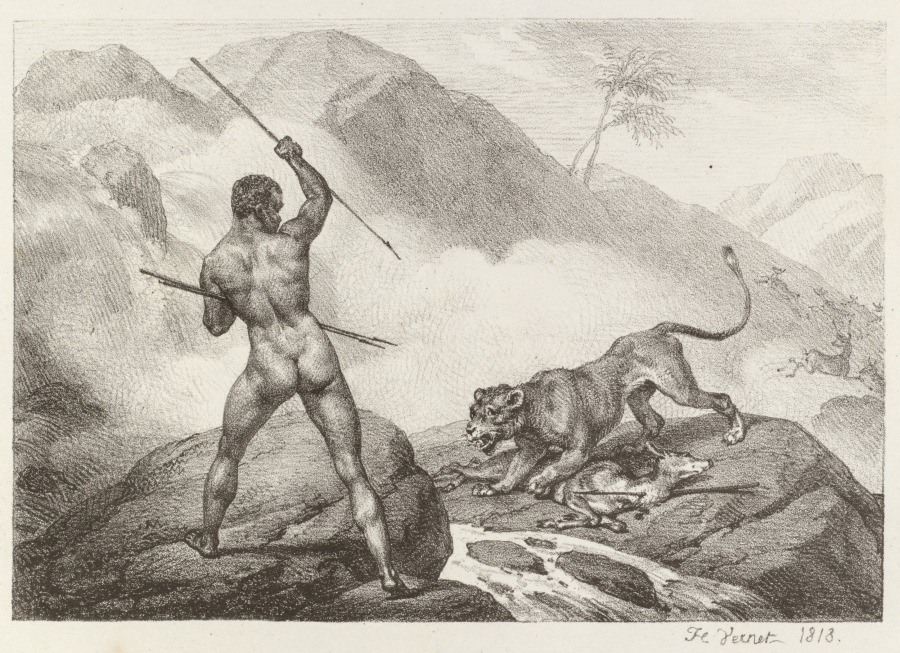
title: African Hunter (Chasseur Africain)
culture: France, 19th century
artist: Horace Vernet (French, 1789–1863)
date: 1818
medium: lithograph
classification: Print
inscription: Below image, in print: H Vernet, 1818. On mat: Proof before title, $425 Tom French, print dealer, Akron, OH 99'